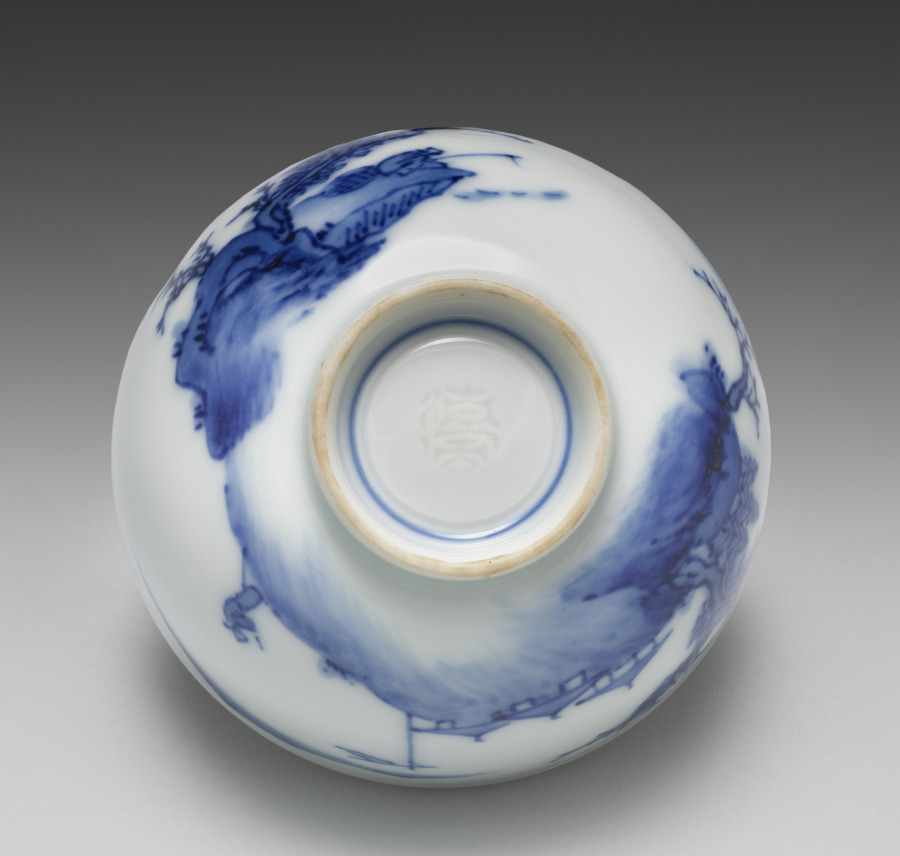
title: Teacup from Tea Set with Chinese Landscape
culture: Japan, Meiji period (1868–1912)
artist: Seifū Yohei III (Japanese, 1851–1914)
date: 1893–1914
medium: Porcelain with underglaze blue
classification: Ceramic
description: The theme of this sencha tea set is the Chinese scholar-recluse in an idyllic landscape. Each of the five teacups has a landscape with an architectural structure and some human activity. This tea set has a side-handled pot called a kyūsu, used for steeping, straining, and serving tea. Unlike some others, this set also has a yuzamashi, a container used to cool boiled water to just the right temperature for the best flavor when steeping. Seifū Yohei III’s painting teacher, Tanomura Chokunyū (1814–1907), made a visual record of famous sencha events that shows how these kinds of porcelains fit with objects such as a stove and kettle to form a complete set of utensils for tea preparation, and with ensembles of decorative objects meant to inspire creativity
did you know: This cup has a man walking toward a group of three pavilions announced with a banner hanging from a tall post; beyond this are two large deciduous trees sheltering a stand of small conifers. Across the water from this site is another man sitting on the bank fishing with a large woven basket for his catch beside him.